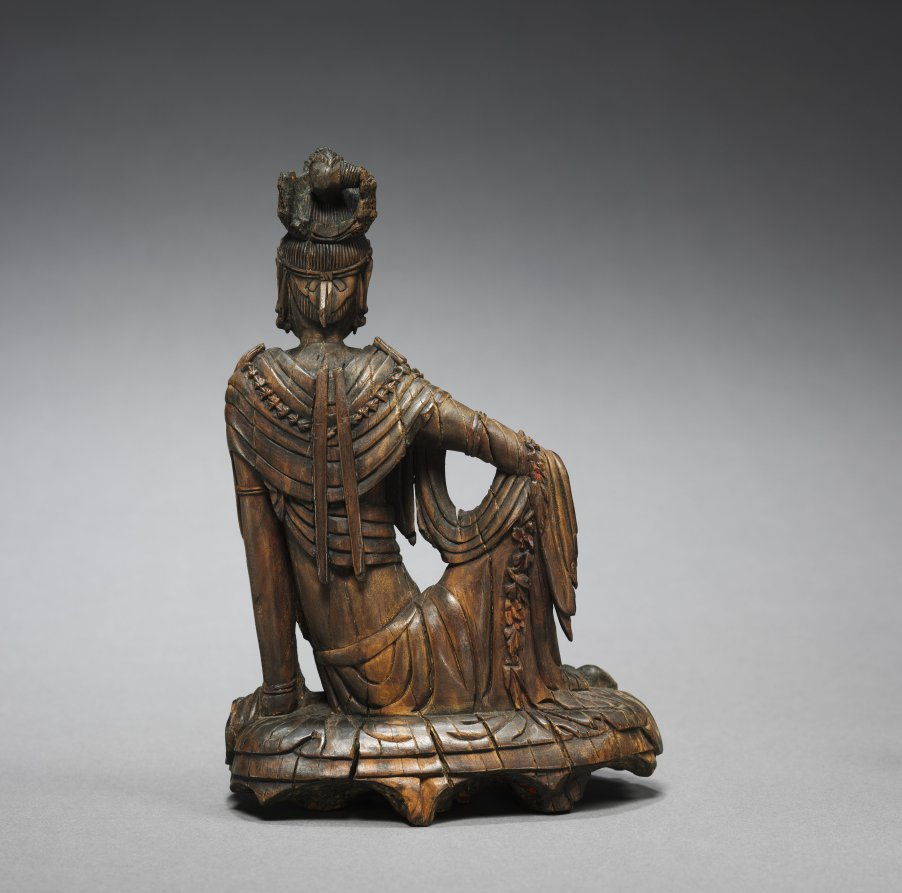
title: Potalaka Guanyin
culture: China, Five dynasties (907-960)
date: 900s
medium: Carved sandalwood with traces of paint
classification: Sculpture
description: This portable figure of Guanyin, the Bodhisattva of Compassion who vowed to stay on earth to help human beings, is carved of precious sandalwood. It is lavishly covered with garlands of flowers that retain traces of the original red paint. The small sculpture may have been used in a private devotional context.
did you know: Mount Potala is the mythical home of the bodhisattva Avalokiteśvara, called Guanyin in Chinese.